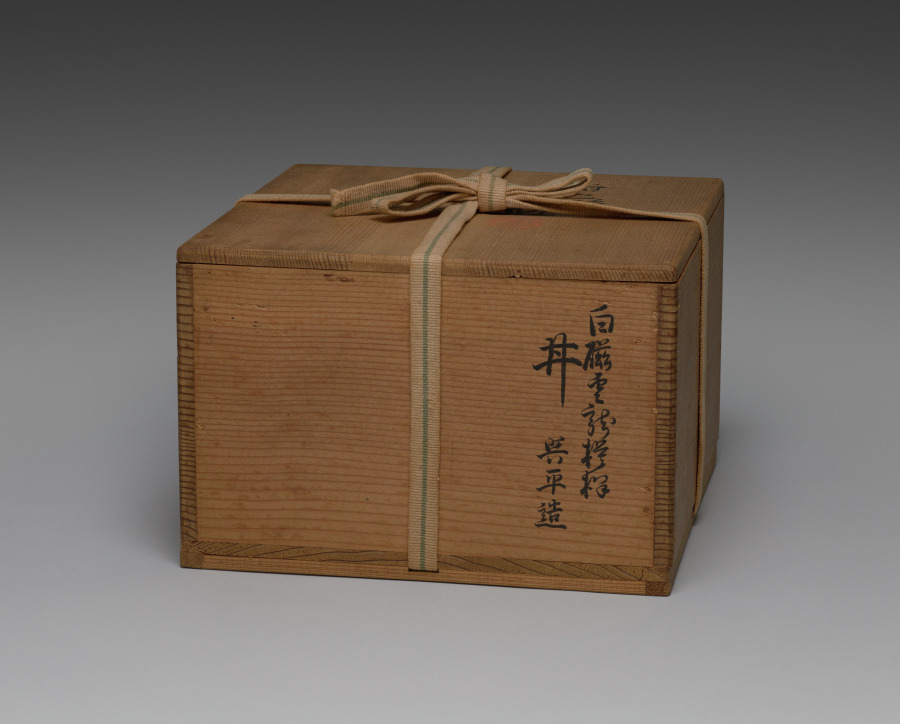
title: Bowl with Dragons Chasing Flaming Jewels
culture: Japan, Meiji period (1868–1912) to Taishō period (1912–26)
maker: Seifū Yohei III (Japanese, 1851–1914)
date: 1893–97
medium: Porcelain with molded and carved design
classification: Ceramic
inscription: 大日本清風造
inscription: 清風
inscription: 清風與平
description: The decoration of this large bowl, described as a donburi on one side of its box, is executed entirely in molded and carved relief under a creamy, pink-tinged translucent glaze. The main motif is a pair of four-clawed dragons pursuing flaming jewels. As is standard for this design, the beasts are surrounded by wisps of cloud, and a foliate pattern runs around the bottom of the basin. A geometric pattern circles the exterior of the footring. The white-on-white design makes the bowl subtle and elegant.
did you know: Kyoto-based Japanese ceramist Seifū Yohei III (1851–1914) admired the glaze colors found on Chinese porcelain and tried to replicate them through intensive experimentation.